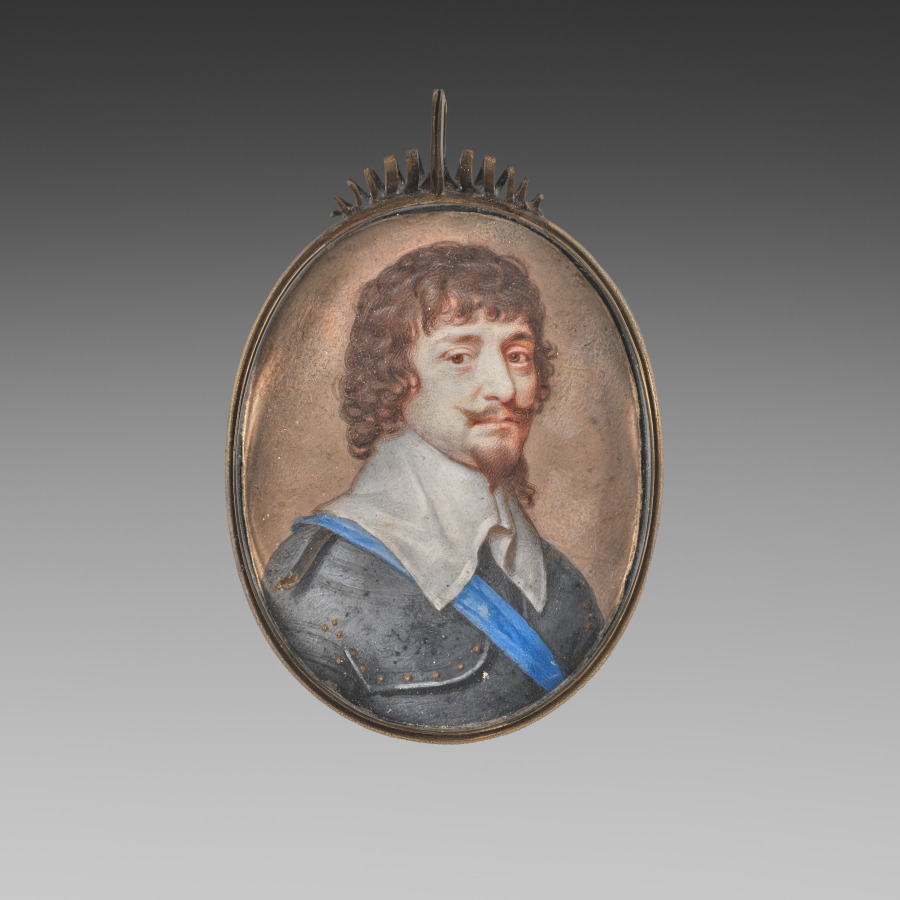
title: Portrait of Frederick V, Elector Palatine, King of Bohemia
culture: England, 17th century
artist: John Hoskins (British, c. 1590–1665)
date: 1630s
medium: watercolor on vellum in a silver gilt frame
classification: Portrait Miniature